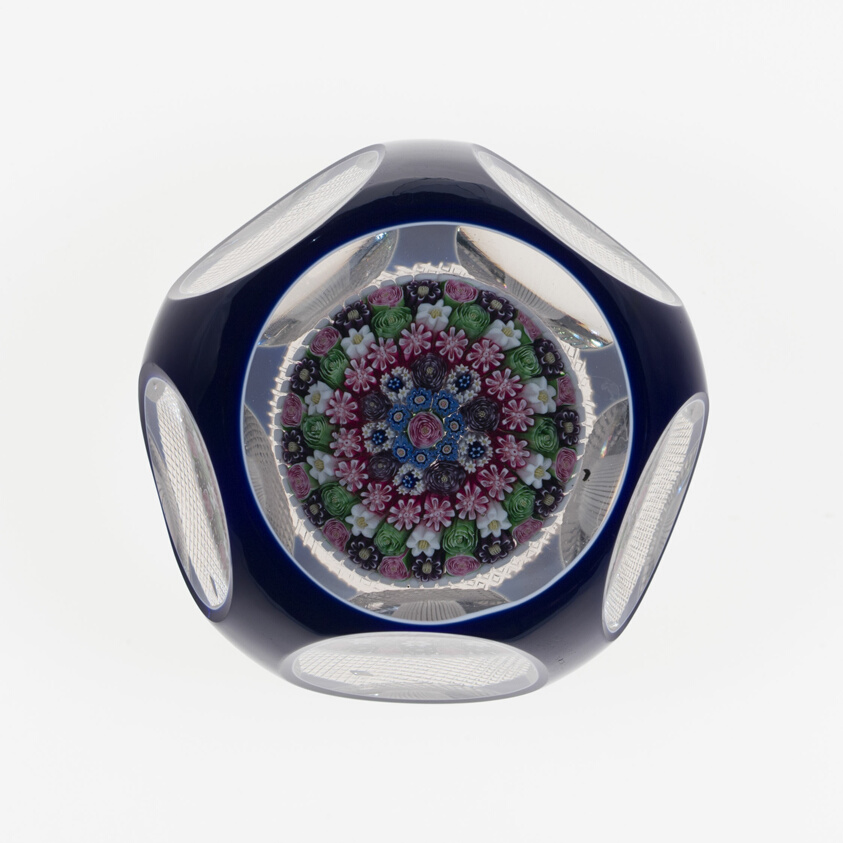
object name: Glass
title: Paperweight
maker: Clichy Glassworks (Cristalleries de Clichy); Clichy, France, 1837-1885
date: c. 1845–60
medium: Glass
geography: Clichy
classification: paperweight; glass